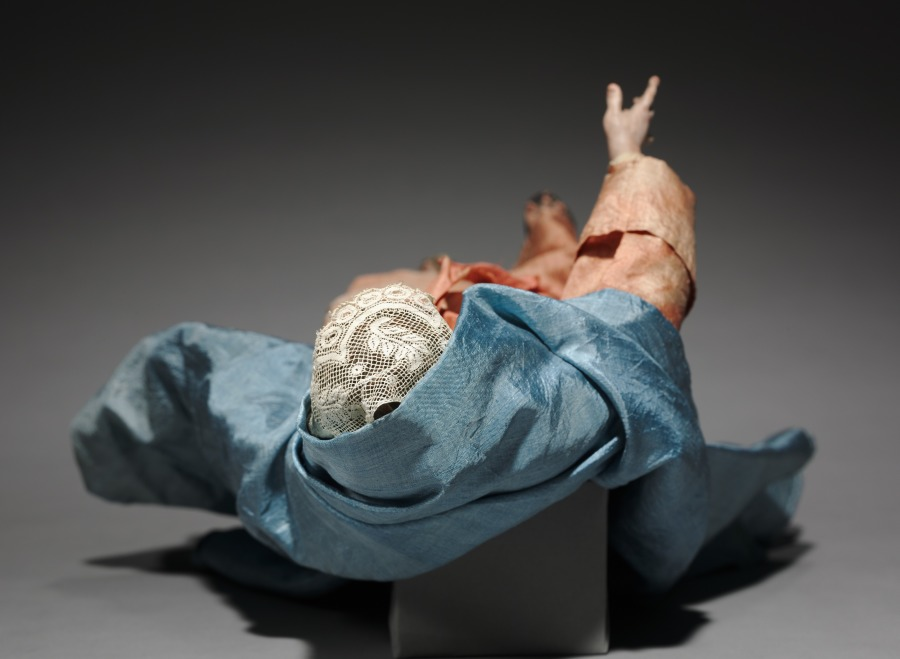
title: Figure from a Crèche: Virgin Mary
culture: Italy, Naples, late 18th-early 19th century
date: 1780–1830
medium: painted wood and terracotta with various textiles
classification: Sculpture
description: The practice of creating scenes of the Nativity for the home dates from the early 1700s in Italy, where people began to set up doll-like figures of about a foot or less in height. The custom was particularly popular in Naples around 1800, where crèche scenes (crèche means cradle, or crib) included many figures, whose heads and hands of painted terracotta, stuffed cloth bodies, and clothing adapted from contemporary local costumes gave them an amazingly realistic character. Representations of the birth of Jesus can be traced to the first few centuries of Christianity. Both living creatures and sculptural depictions of them were used from early times. By the late middle ages it was customary to create life-size figures of wood or stone, naturalistically painted, to represent the characters who participated in the events of Jesus's early life. These sculptures were then arranged in scenes illustrating one or both of the most important of these events, the Adoration of the Shepherds and the Adoration of the Magi-the three kings from the East who came to pay homage to the Christ child. Used in churches, these large figures were especially popular in Italy, Central Europe, Spain, and Portugal.